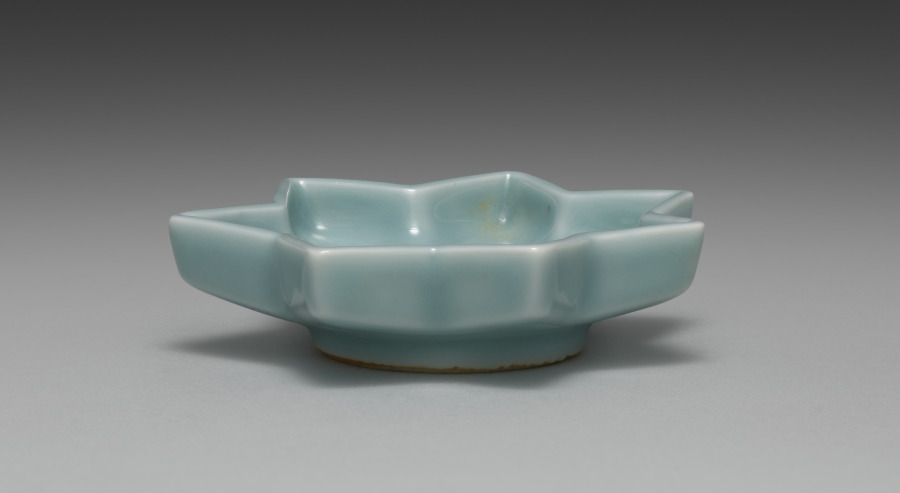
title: Saucer from Maple Leaf-Shaped Saucers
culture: Japan, Meiji period (1868–1912)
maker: Seifū Yohei III (Japanese, 1851–1914)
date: 1893–1914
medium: One of five dishes from a set of ten; porcelain with blue glaze and molded design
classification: Ceramic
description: These maple leaf–shaped saucers, like Yohei III's five shell saucers CMA 2022.188, have a long, horizontal box with a separate compartment for each piece. Now a set of five, these dishes were originally a set of ten, stored in two boxes of five each. From their housings, which accommodate differing numbers of objects, one can hypothesize that while some items created by the Seifu studio were intended to be acquired in larger sets, and thus were perhaps made to order, others, like these, may have been items to be purchased of the shelf in set quantities that allowed clients flexibility in scale. The box for these five saucers describes them as “heavenly blue[–glazed] porcelain” (tenseiji). The veins of the leaves are slightly raised in the clay so that the glaze pools around them and they stand out as white where the glaze thins. There are longer lines at the points of the leaves and shorter ones following the wall of each indentation so that the design has both a horizontal and a subtle vertical dimension.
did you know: These saucers shaped like maple leaves show Seifū Yohei III’s “heavenly blue glaze.”